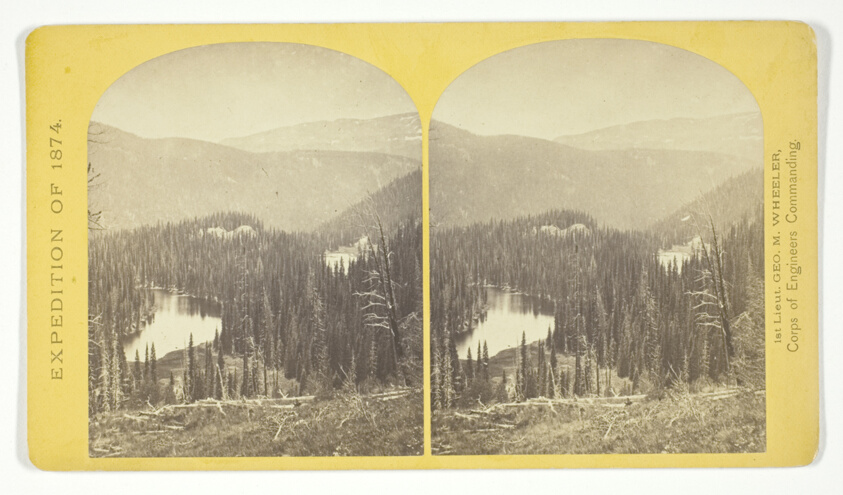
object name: Photograph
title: Lost Lakes, head of Conejos Cañon, Colorado, in the Sierra San Juan range, near divide between Conejos and south fork of Alamosa Rivers, surrounded by forest of Douglass spruce, and approximately 11.000 feel above sea-level, No. 37 from the series "Geographical Explorations and Surveys West of the 100th Meridian"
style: 19th century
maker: Timothy O'Sullivan (American, born Ireland, 1840–1882); commissioned by George Wheeler for the War Department, Corps of Engineers, U.S. Army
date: 1874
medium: Albumen print, stereo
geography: United States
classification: stereograph (albumen); photography; photograph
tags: Collected by Hugh Edwards, Geographical Explorations and Surveys